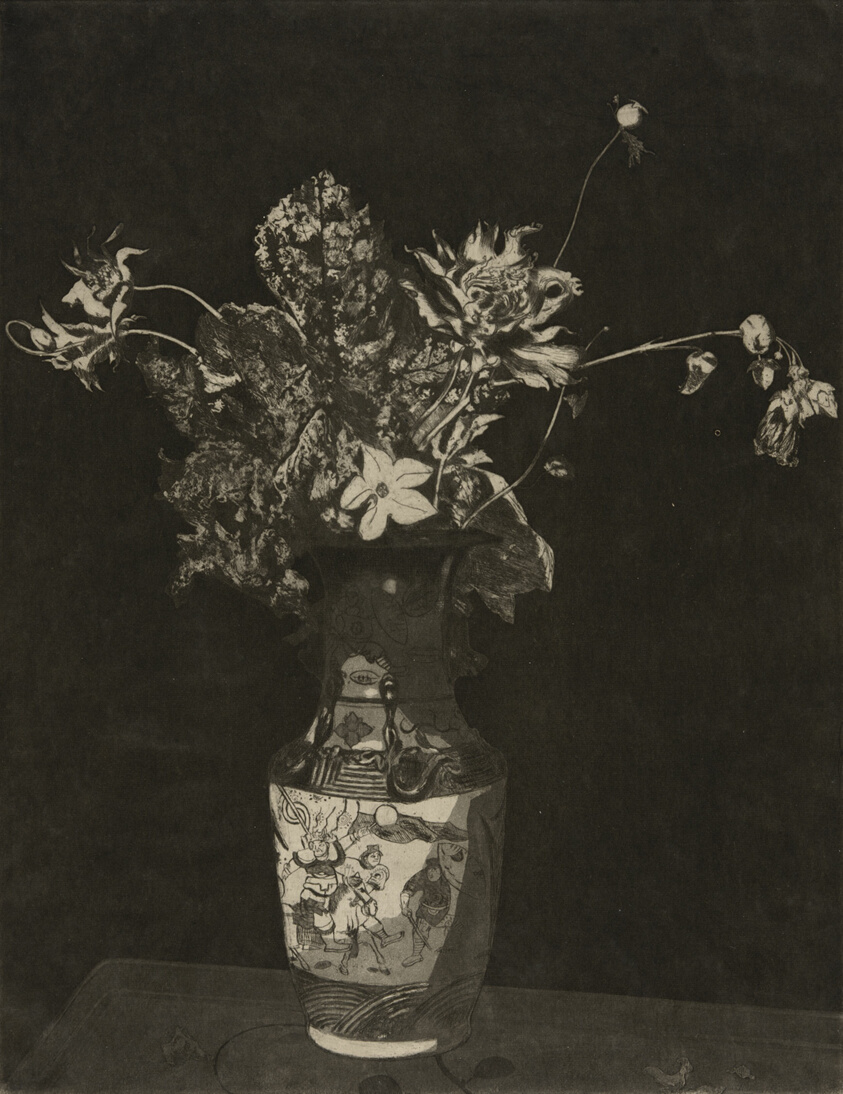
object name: Print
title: L'Agonie des Fleurs (Black and White Version)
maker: Theodore Roussel (French, worked in England, 1847-1926)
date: 1890–95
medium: Etching, softground, and aquatint in black on cream wove imitation Japanese paper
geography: England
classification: etching; paper; print; prints and drawing